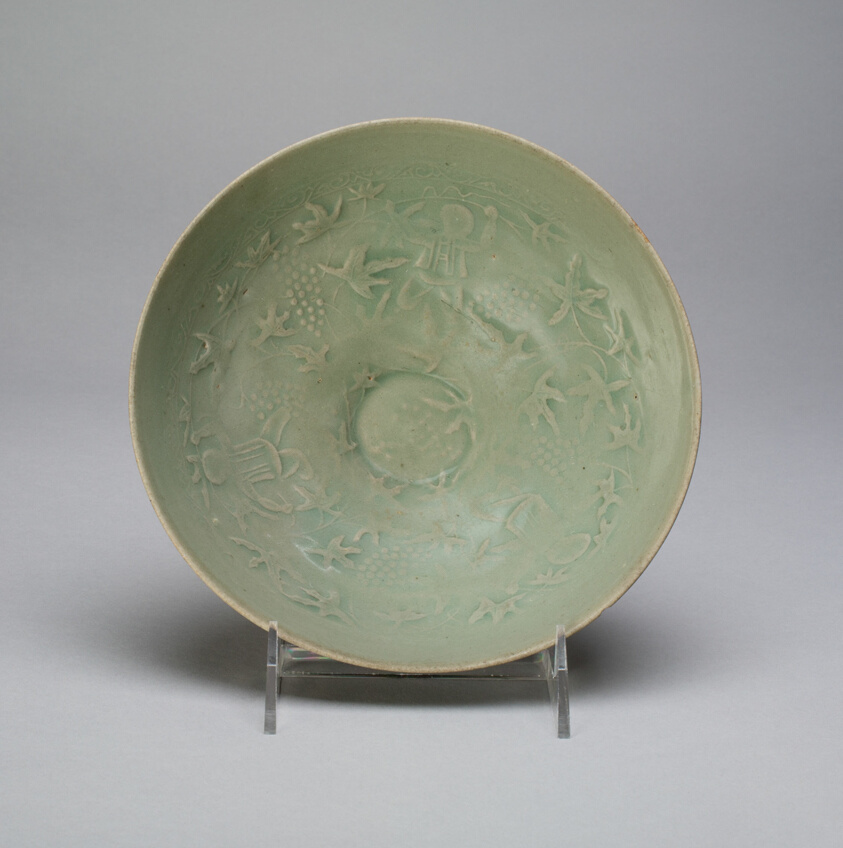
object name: Vessel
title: Bowl with Children and Grape Motifs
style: Korean (culture or style)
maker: Korea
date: Goryeo dynasty (918–1392), mid–late 12th century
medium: Stoneware with celadon glaze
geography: Korea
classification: bowl; stoneware; dish (vessel); asian art; ceramics; vessel